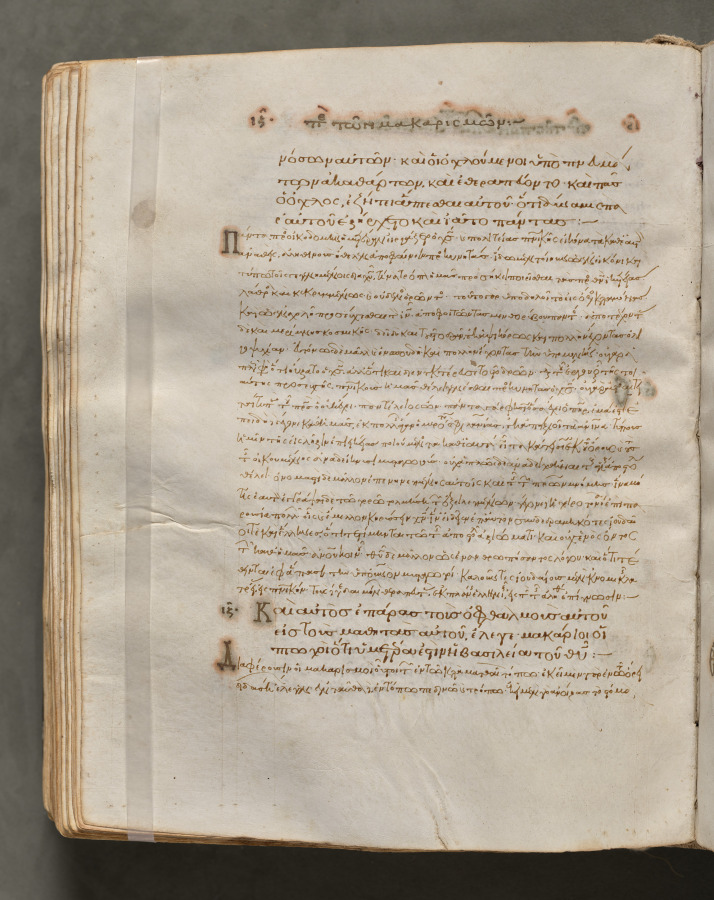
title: Text, folio 227 (verso), from a Gospel Book with Commentaries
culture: Byzantium, Constantinople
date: c. 1000–1100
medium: ink, tempera, and gold on vellum; leather binding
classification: Bound Volume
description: Each of the four gospels in this book opens on a page with brilliantly illuminated borders depicting the author of the text as well as birds-principally peacocks, symbols of the immortality of the soul-and fountains, representing the fountain of life and the salvation of the soul. This volume consists of 428 leaves with texts in Greek. Its level of sophistication suggests that it was probably written and decorated in a monastery in Constantinople.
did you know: Gospel Books were carried in procession through Byzantine churches.